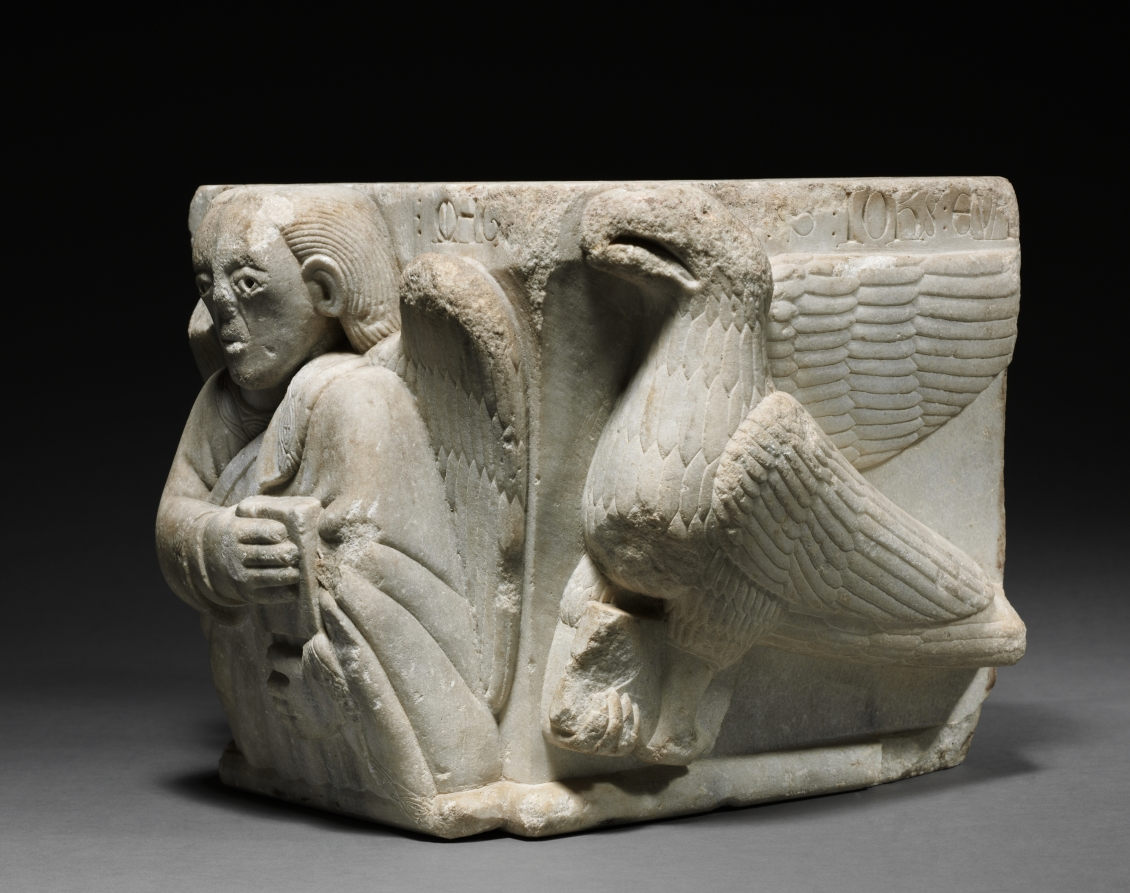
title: Engaged Capital with Figures of a Man and of an Eagle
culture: Northern Italy, Emilia (Bologna?), 12th century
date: 1175–1200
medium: marble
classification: Sculpture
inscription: face with half-figure of an angel with Gosepl bears the inscription: S. MAT; face with an eagle holding Gospel bears the inscription: S. IOHS. EVA.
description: These creatures, as indicated by their Latin inscriptions, are symbols personifying the Evangelists Matthew (man) and John (eagle). This iconography derives from the Book of Revelation.